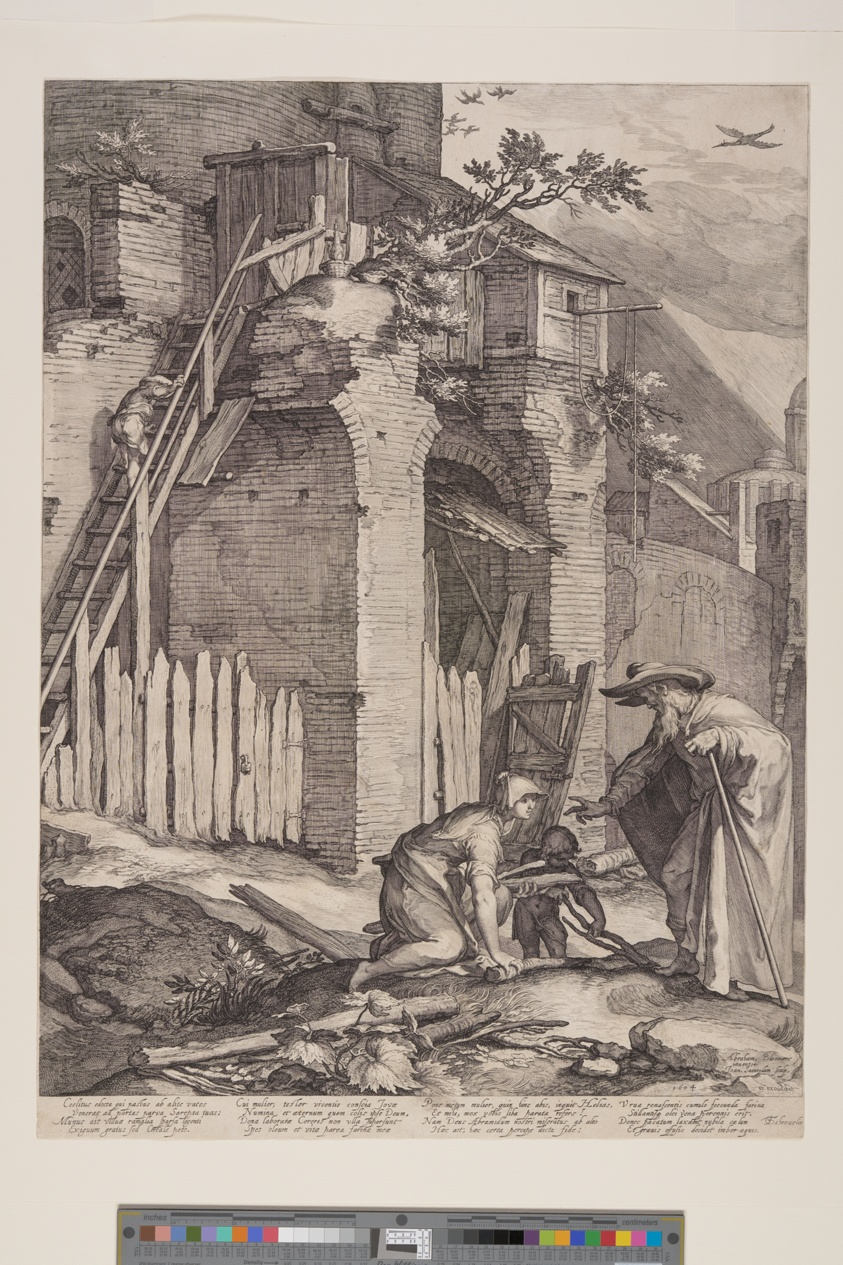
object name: Print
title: Prophet Elijah with the Widow of Zarephath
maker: Jan Saenredam (Dutch, 1565–1607); after Abraham Bloemaert (Dutch, 1566–1651)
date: 1604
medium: Engraving on ivory laid paper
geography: Netherlands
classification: engraving; paper; print; prints and drawing